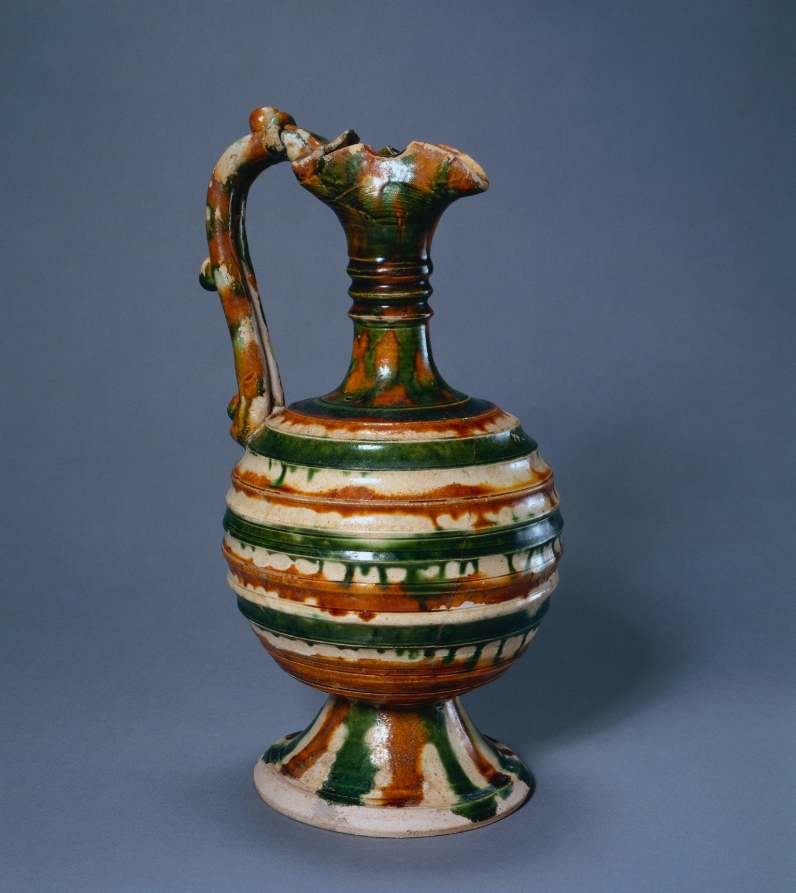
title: Ewer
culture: China, Tang dynasty (618-907)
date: 700–750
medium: glazed earthenware, sancai (three-color ware)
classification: Ceramic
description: Many sancai or "three-color" lead-glazed wares-such as this ewerare notable for their heavy dependence on metalwork prototypes. Such polychrome glazed wares were intended for the tomb.